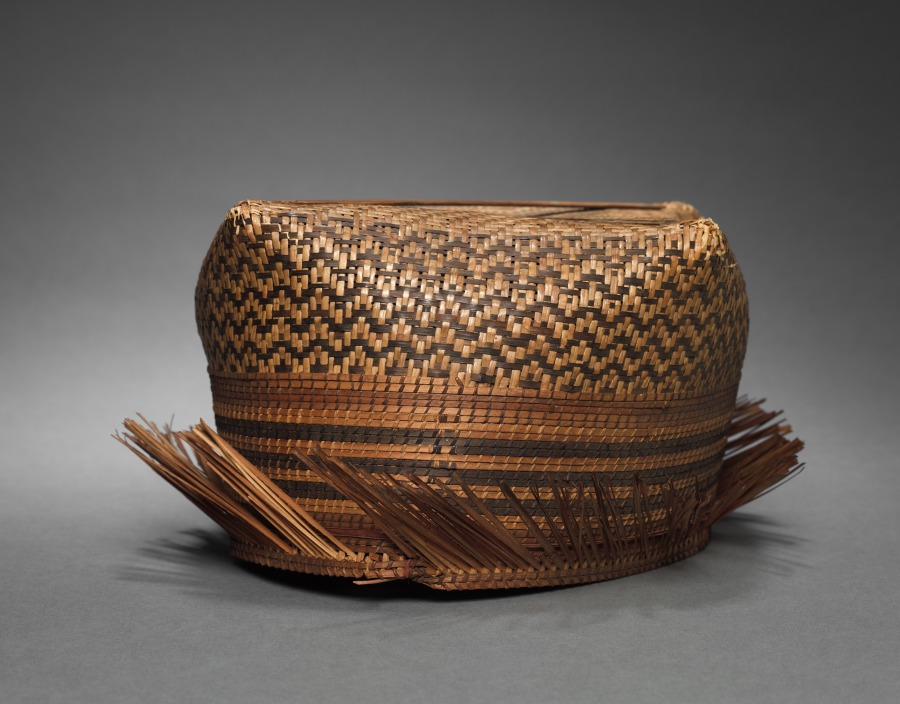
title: Hat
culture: Africa, Central Africa, Democratic Republic of the Congo, Mangbetu-style maker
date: before 1929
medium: Plant fibers and dye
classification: Garment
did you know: This woven hat looks brand new because it was one of the many items the business-savvy chief of Ekibondo had artists and artisans make for the foreigners who passed through his village.